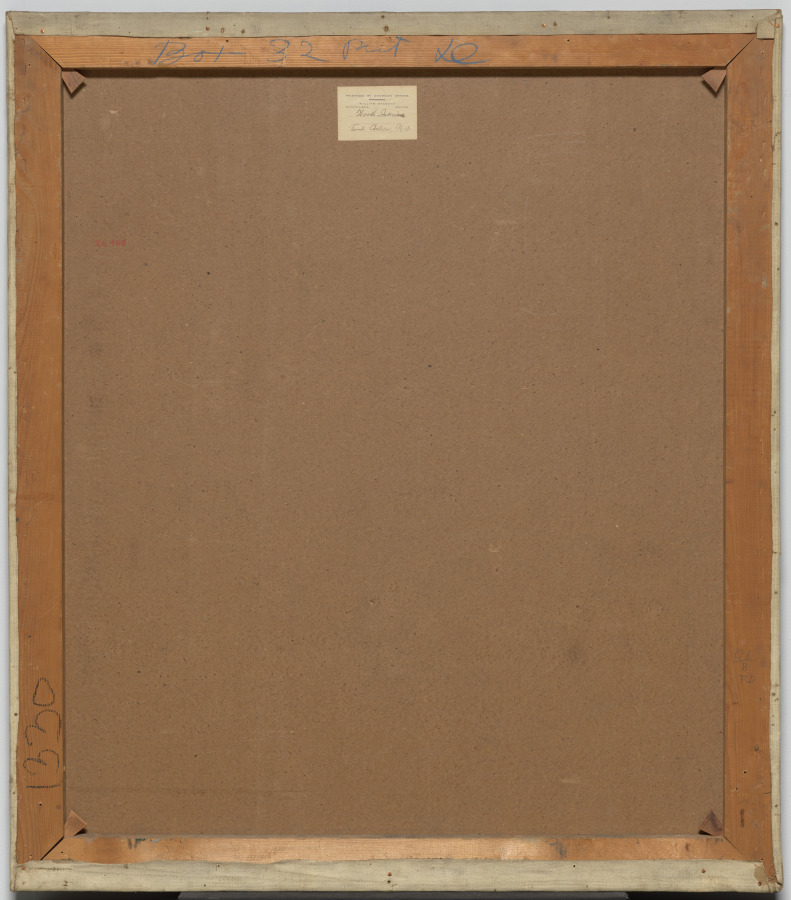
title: Wood Interior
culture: America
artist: Emil Carlsen (American, born Denmark, 1848–1932)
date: c. 1910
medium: oil on canvas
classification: Painting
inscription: signed lower right: Emil Carlsen.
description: Through luminescent color, filtered light, and a subtle evocation of atmosphere, Carlsen created a quiet, meditative mood in Wood Interior. The delicate trees, trickling brook, and soft bed of the forest floor invite a tranquil retreat from bustling city life. The painting’s lighter palette is complemented by its custom-made gilded frame, which is crafted in muted 16-karat gold rather than the standard, more vibrant 18-karat.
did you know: Carlsen’s son Dines also became a professional artist, and the two exhibited together several times.